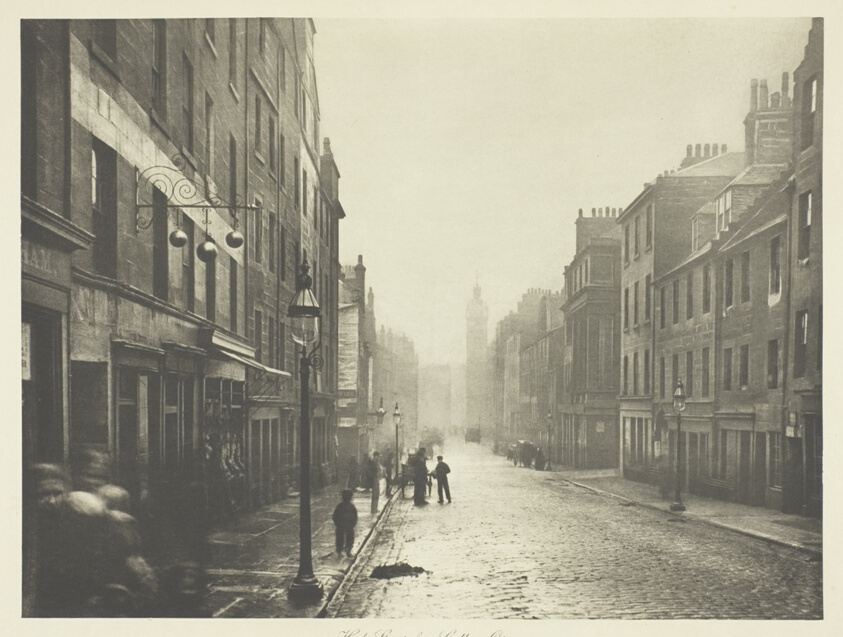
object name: Photograph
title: High Street from College Open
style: 19th century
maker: Thomas Annan (Scottish, 1829–1887)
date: 1868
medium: Photogravure, plate 4 from the book "The Old Closes & Streets of Glasgow" (1900)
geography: Scotland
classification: photograph; photography